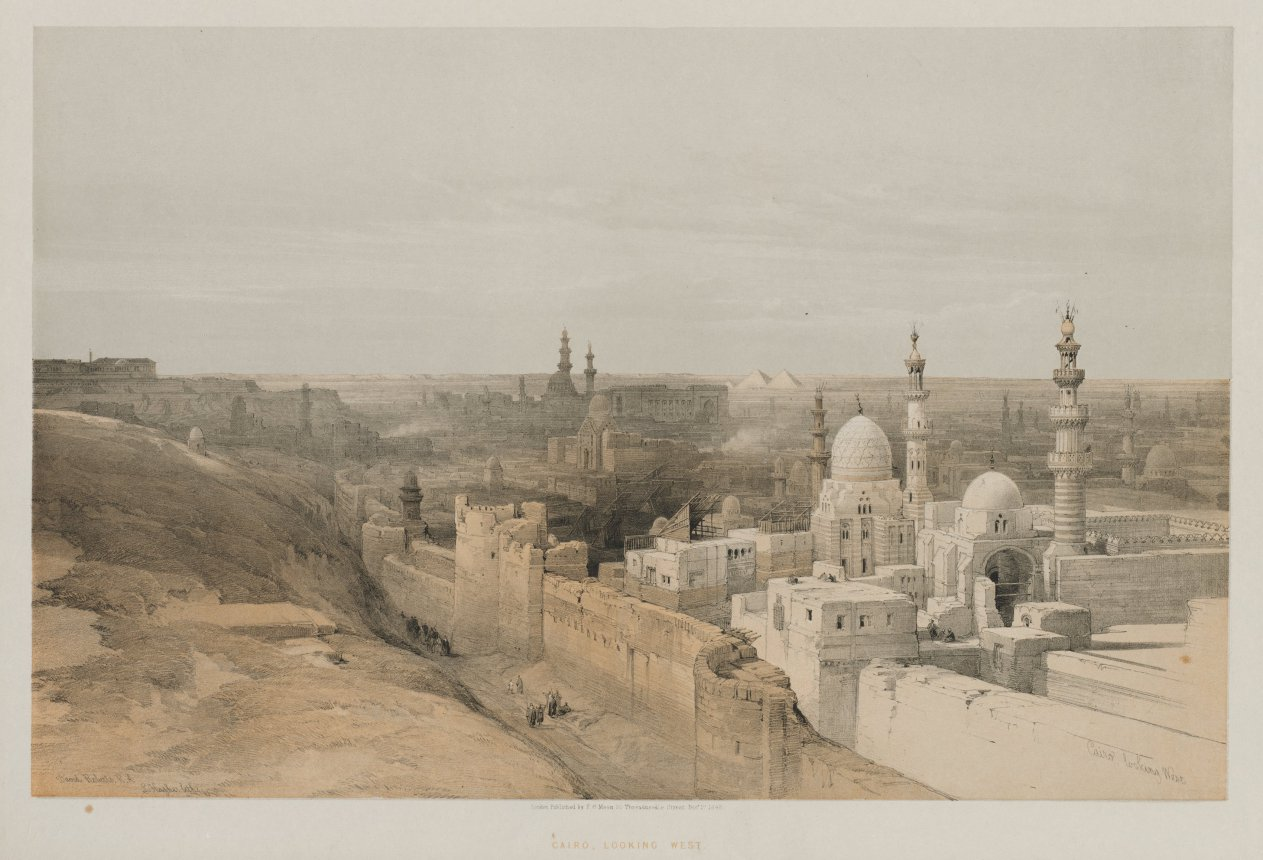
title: Egypt and Nubia, Volume III, No. 26, Cairo, Looking West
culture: England, 19th century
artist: Louis Haghe (British, 1806–1885)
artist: after David Roberts (Scottish, 1796–1864)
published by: F. G. Moon, 20 Threadneedle Street, London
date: 1848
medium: color lithograph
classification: Print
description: This printed leaf depicts a panoramic scene of Cairo around the 1800s, viewed from the west. David Roberts was among the earliest British artists to travel to the Middle East in 1838–39, a trip that resulted in more than 250 drawings depicting Egypt and the Holy Land. He later worked with printer Louis Haghe to translate these works into lithography to reach a wider audience at a time of expanding European colonialism.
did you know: The Cairo skyline is pierced by minarets, the slender mosque towers from which the Muslim faithful would be called to prayer.